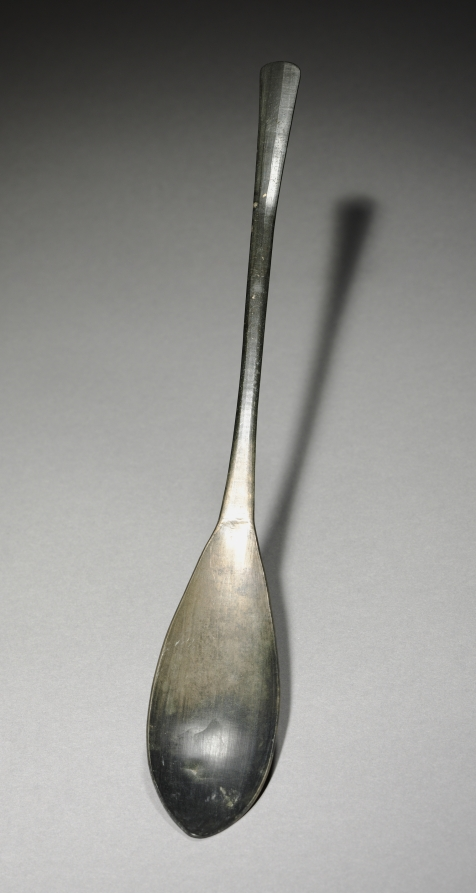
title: Spoon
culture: Korea, Goryeo dynasty (918–1392)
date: 918–1392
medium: silver bronze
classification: Metalwork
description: Celadons, spoons, seals, and bronze mirrors were the most common burial objects in tombs during the Goryeo period (918–1392). Furnishing tombs with an elaborate assemblage of objects was believed to honor and comfort the newly dead. Generally, Goryeo tombs were left untouched until the late 19th century. During the colonial period (1910–45), however, Japanese archaeologists hastily excavated the tombs located in Kaeseong, the former capital of the Goryeo period. Scholars recently have proposed that toward the end of the 14th century, Koreans enjoyed meat-based soups more than any other dishes, explaining why many more spoons than chopsticks were buried in tombs.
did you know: Bronze spoons are the most common burial item. Scholars have proposed that toward the end of the 14th century, Koreans enjoyed meat-based soups more than any other dishes, explaining why spoons became common household items as well as burial goods.